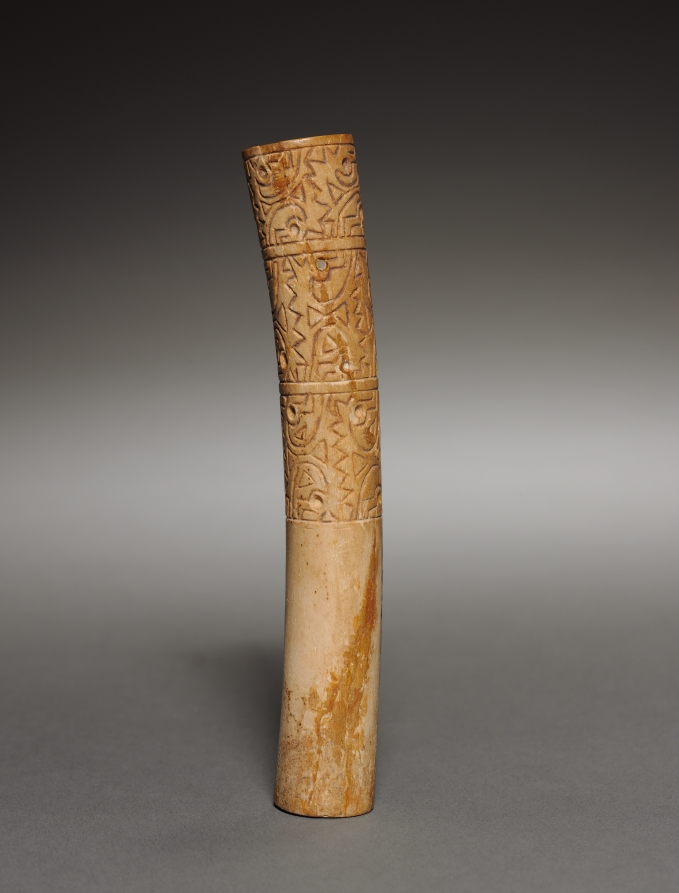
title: Ear Ornament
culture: Peru, Moche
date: 200–550 CE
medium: incised bone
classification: Jewelry